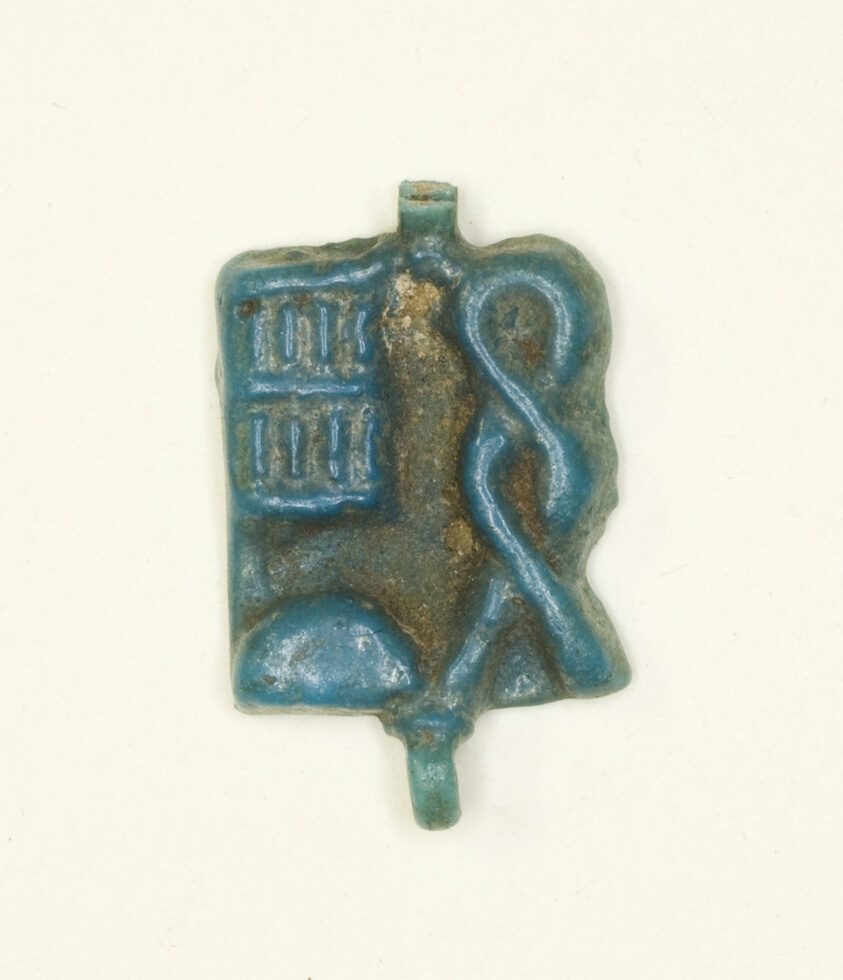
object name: Costume and Accessories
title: Plaque Amulet with the Name of the God Ptah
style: third intermediate period, egyptian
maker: Egyptian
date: Third Intermediate Period, Dynasty 21–25 (1070–656 BCE)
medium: Faience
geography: Egypt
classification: amulet; ceramics; jewelry; ancient art; costume; faïence (composite material)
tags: gods (deities)